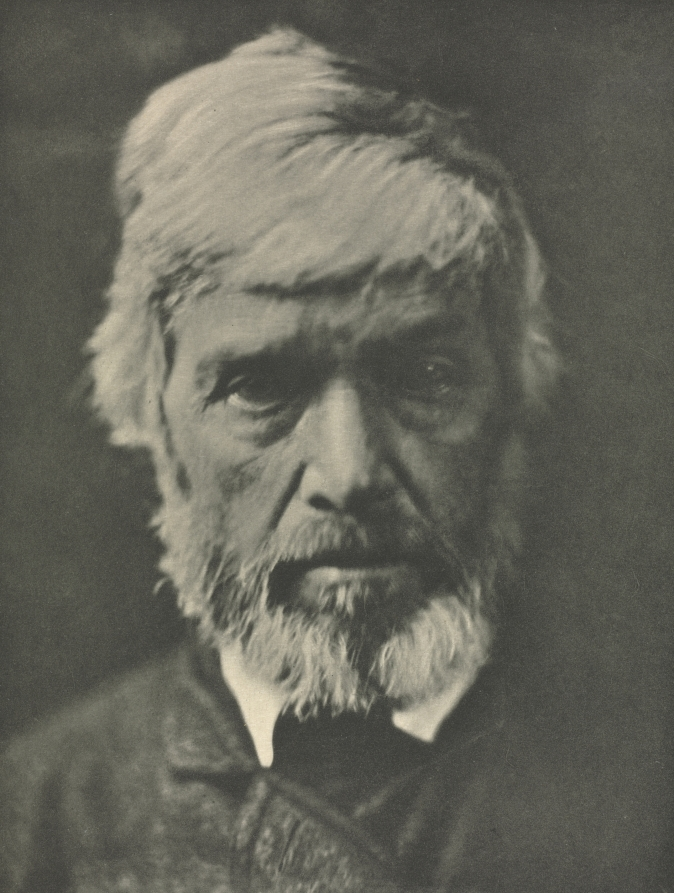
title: Camera Work: Carlyle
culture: England, 20th century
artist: Julia Margaret Cameron (British, 1815–1879)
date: 1913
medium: photogravure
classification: Bound Volume